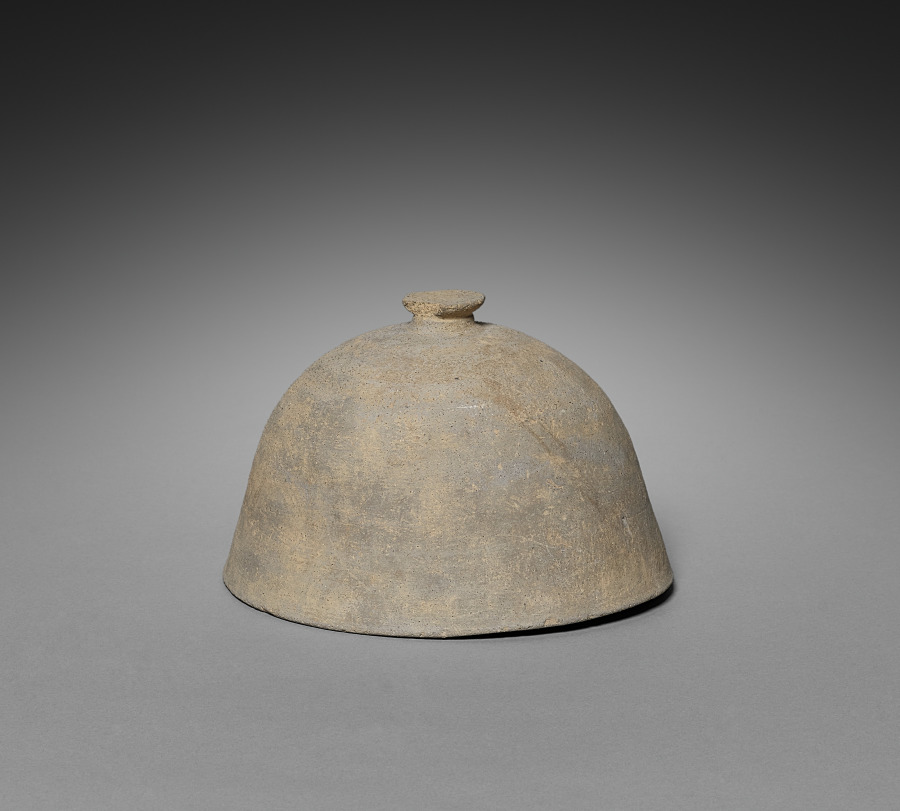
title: Burial Urn with Cover (lid)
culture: Korea, Three Kingdoms period (57 BCE–668 CE)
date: 300s–500s CE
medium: earthenware with impressed design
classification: Ceramic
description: Produced in closed kilns built on hillsides during the Three Kingdoms period, this lidded jar once contained the cremated remains of the dead. This type of burial jar became widespread after the introduction of Buddhism, as cremation became a common practice in Korea.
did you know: Closed kilns built on hillsides became widely used for producing this type of pottery vessel in Korea during the Three Kingdoms period.